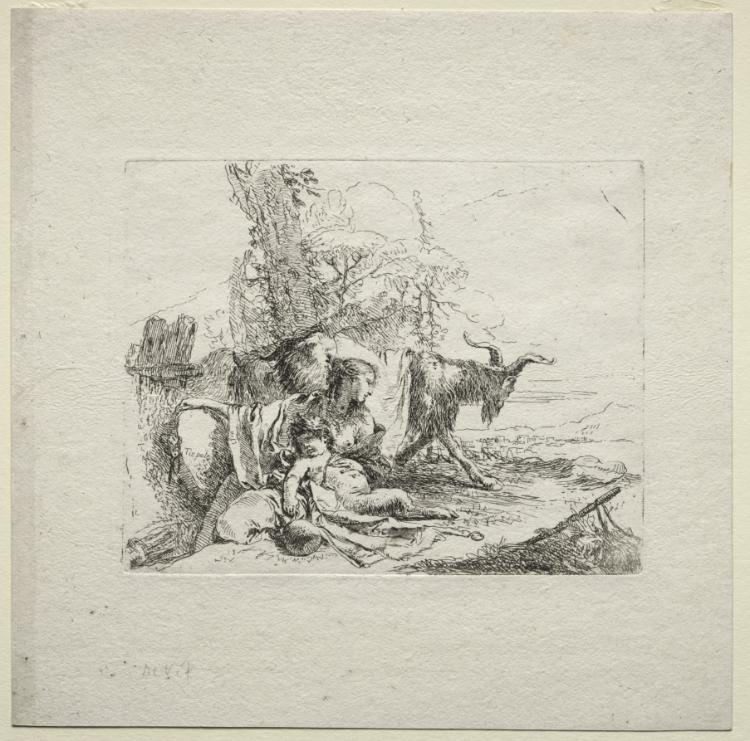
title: Various Caprices: The Woman with Tambourine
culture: Italy, 18th century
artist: Giovanni Battista Tiepolo (Italian, 1696–1770)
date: 1735–50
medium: etching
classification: Print